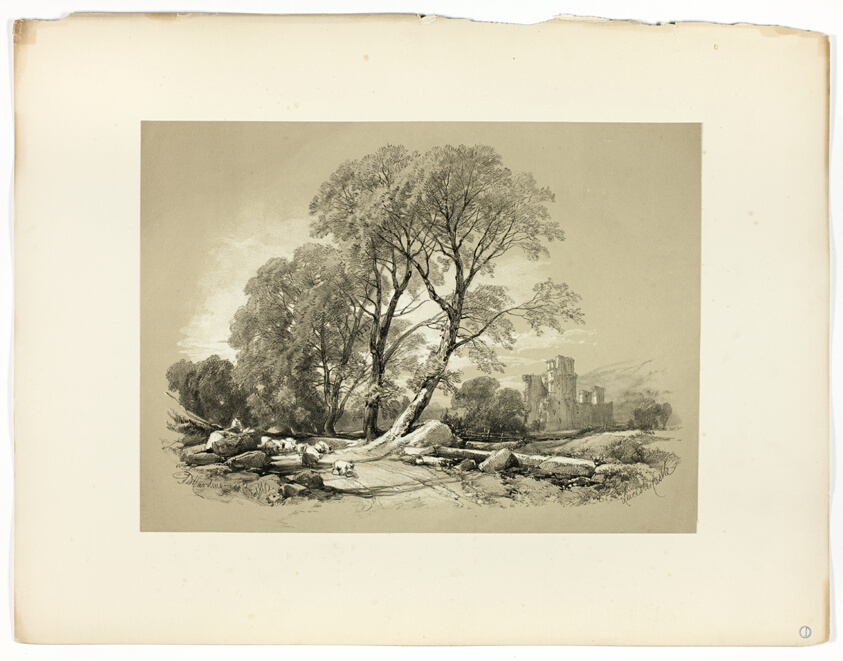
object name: Print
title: Leicester Castle, from Picturesque Selections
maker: James Duffield Harding, (English, 1798-1863); Published by W. Kent and Co.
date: 1860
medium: Lithograph on paper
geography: England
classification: lithograph; print; prints and drawing